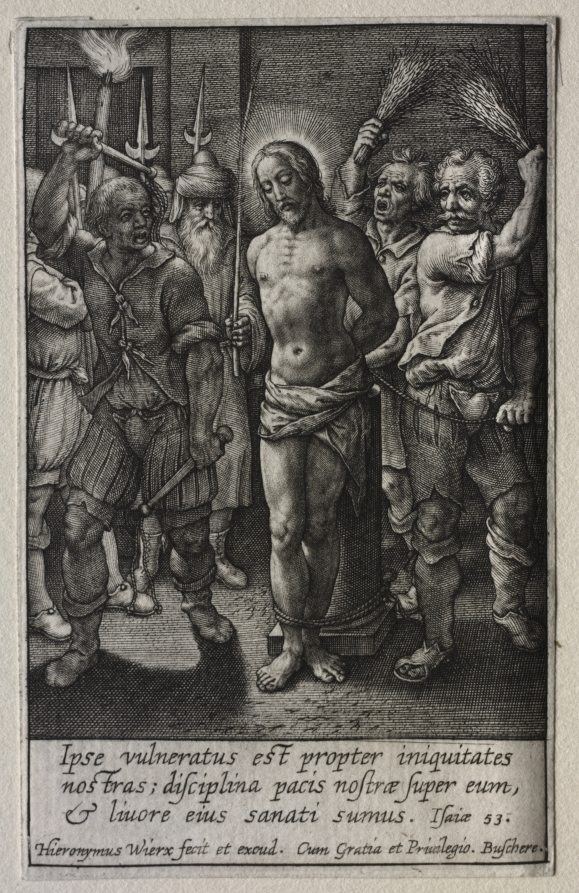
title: The Passion: The Flagellation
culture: Flanders, late 16th-early 17th century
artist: Hieronymus Wierix (Flemish, 1553–1619)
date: before 1619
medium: engraving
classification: Print